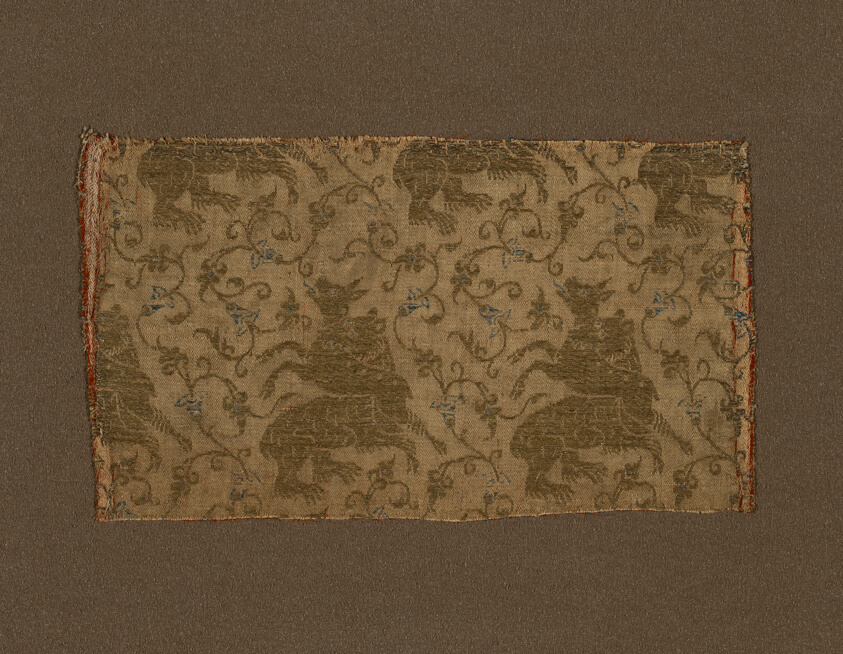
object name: Textile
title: Fragment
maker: Italy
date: 1350/1400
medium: Silk and animal-substrate-wrapped linen, warp-float faced 5:1 satin weave with weft-float faced 1:3 's' twill interlacings of secondary binding warps and supplementary patterning wefts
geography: Lucca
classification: textile; weaving